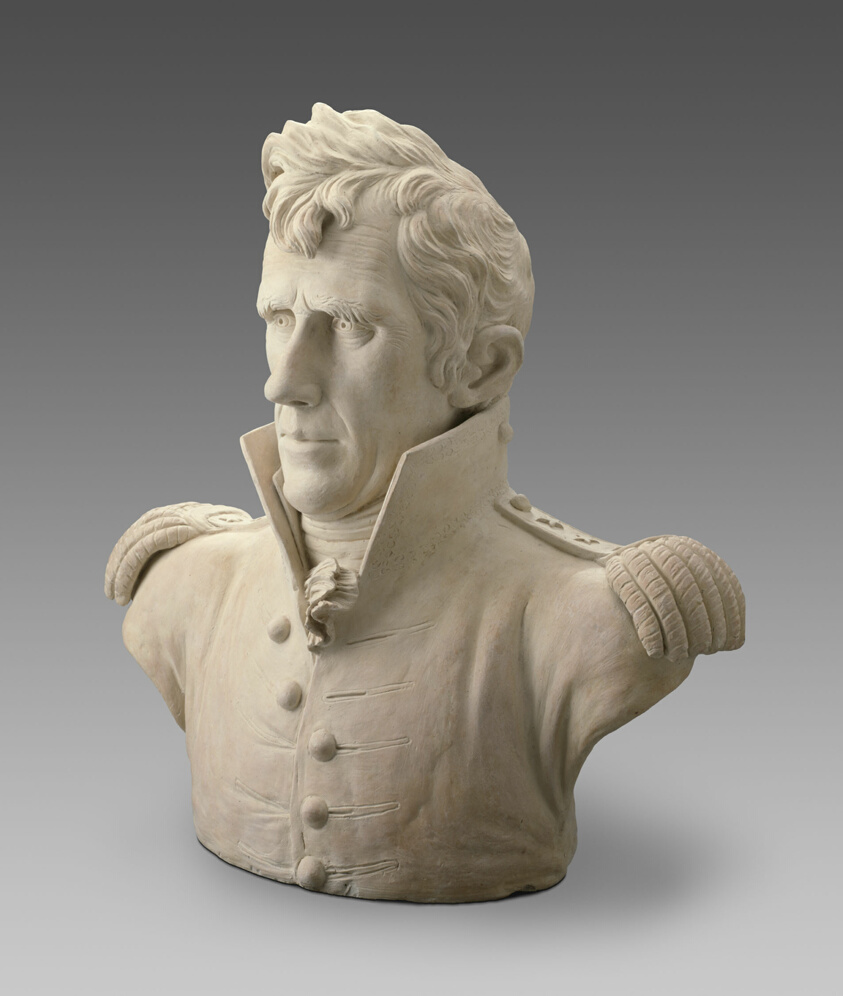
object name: Sculpture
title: General Andrew Jackson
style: 19th century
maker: William Rush (American, 1756–1833)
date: 1819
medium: Terracotta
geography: Philadelphia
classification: sculpture; american arts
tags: men, uniforms, generals, military, busts, people, portraits